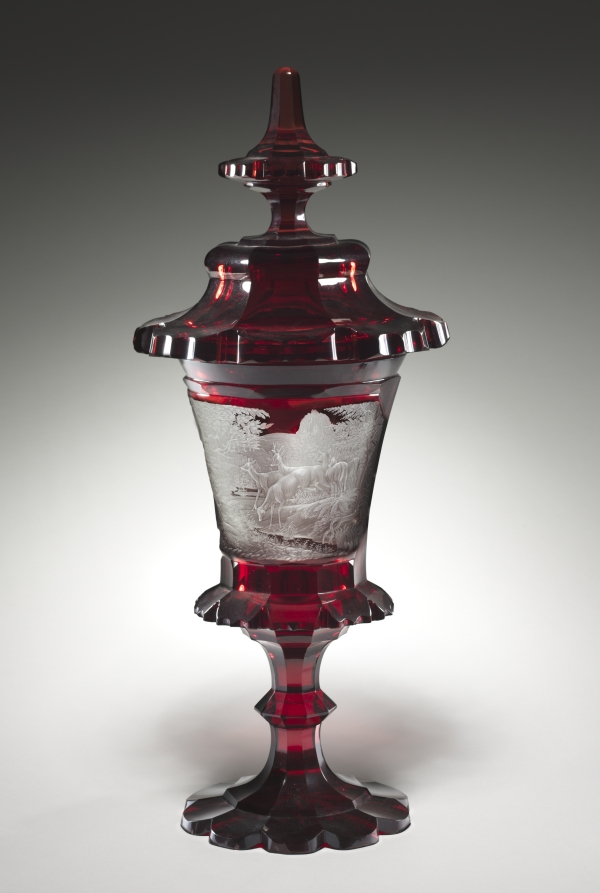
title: Covered Cup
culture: Bohemia, 19th century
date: mid-1800s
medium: ruby glass with engraved decoration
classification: Glass